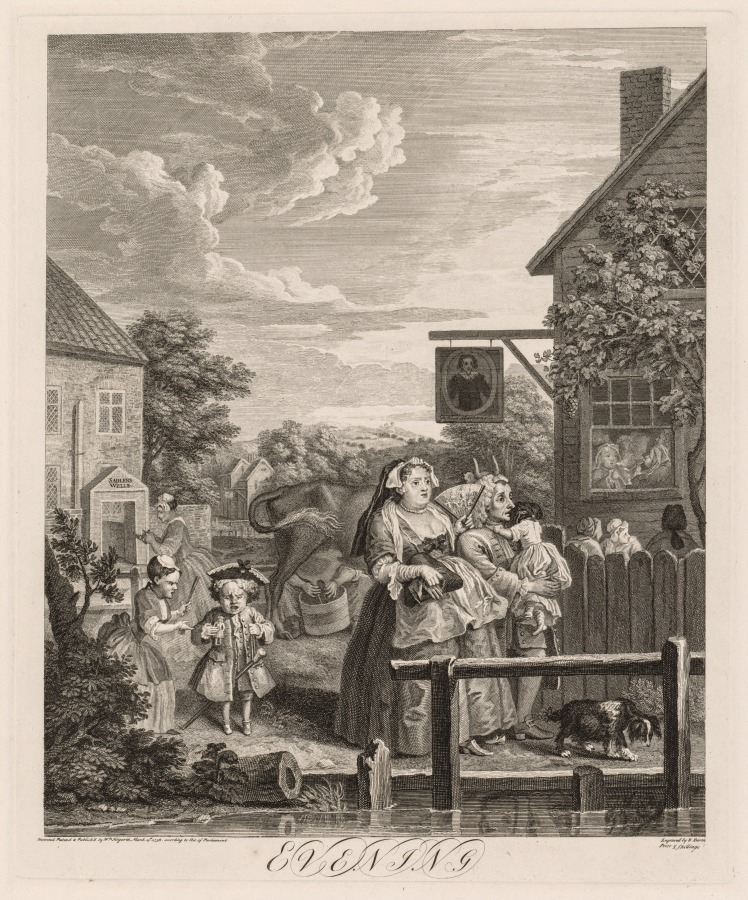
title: The Four Times of Day: Evening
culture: England, 18th century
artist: William Hogarth (British, 1697–1764)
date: 1738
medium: engraving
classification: Print